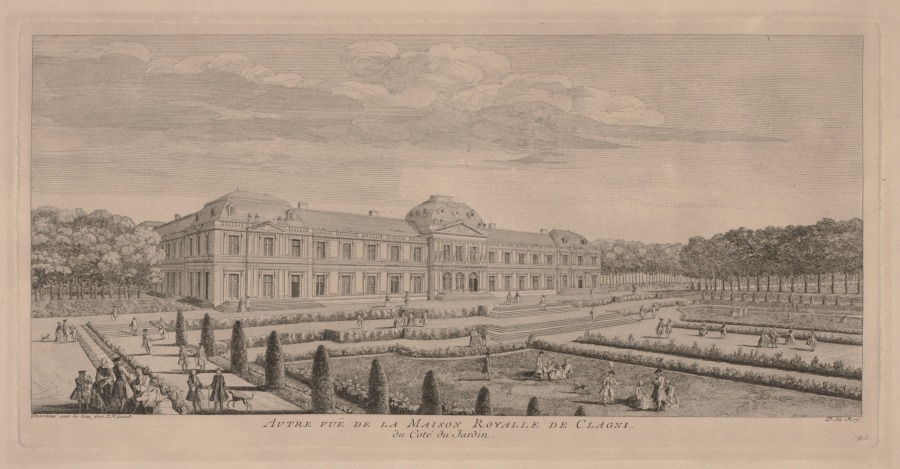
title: Royal Chateau at Clagny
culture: France, 18th century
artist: Jacques Rigaud (French, 1681–1754)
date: c. 1720–50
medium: engraving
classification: Print